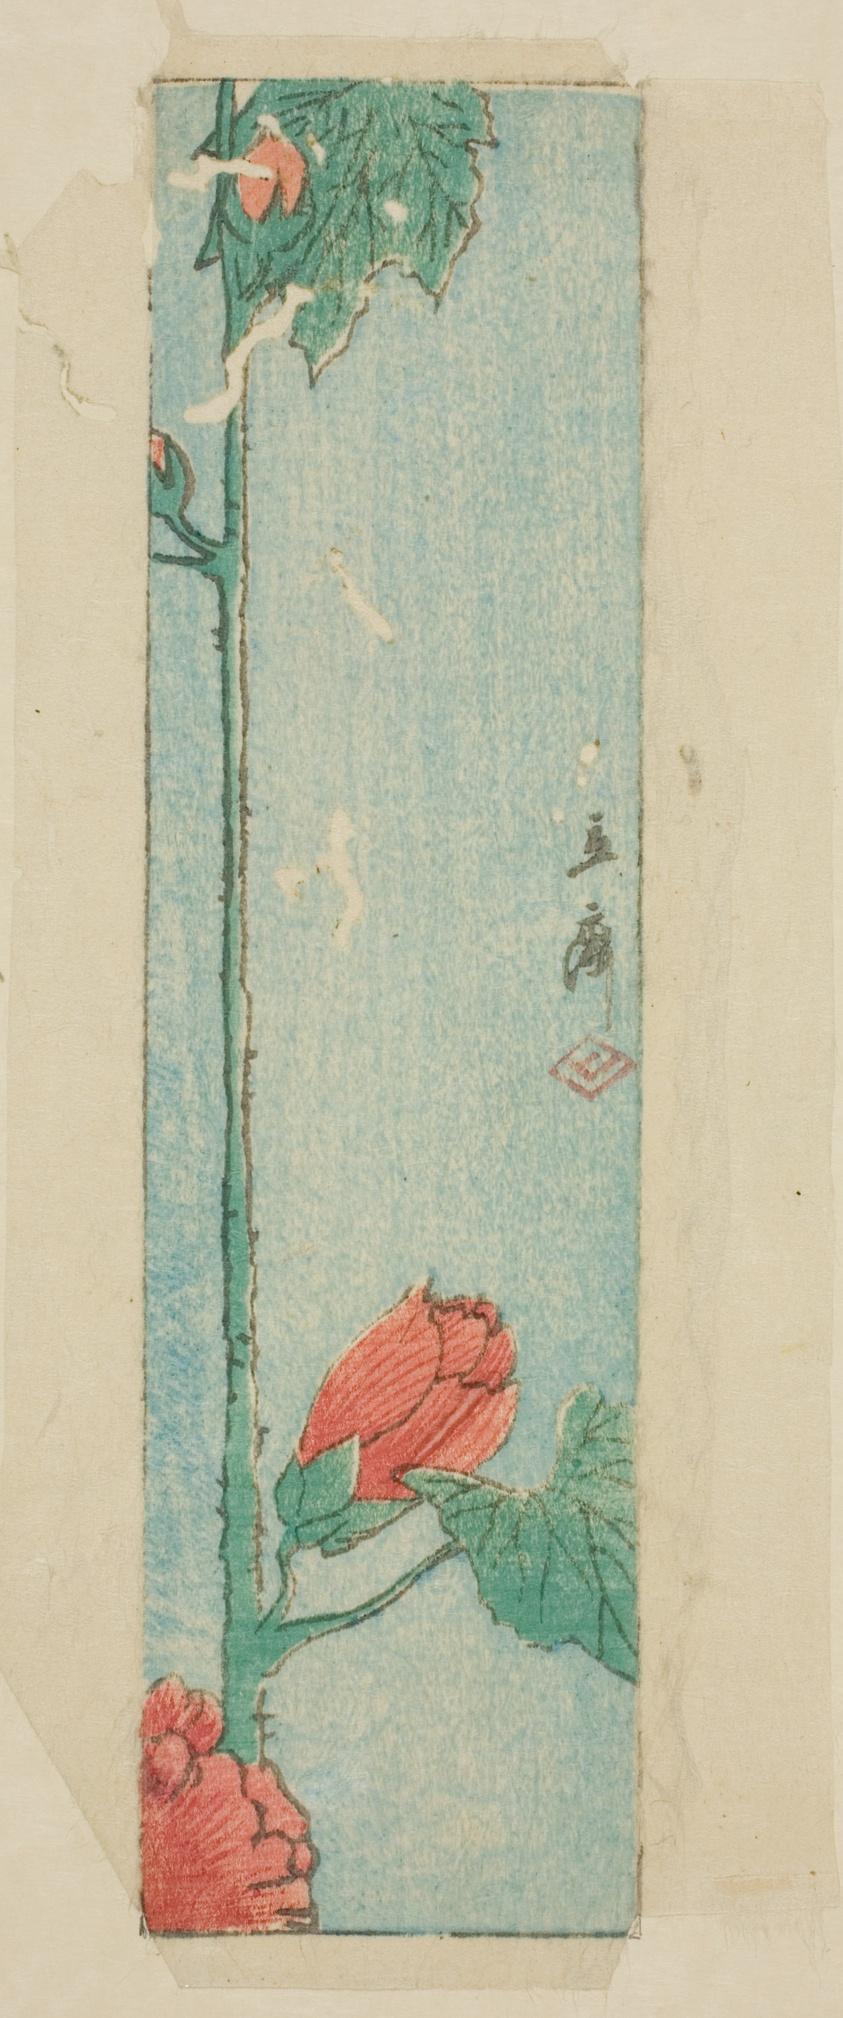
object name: Print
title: Envelope with hibiscus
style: Japanese (culture or style)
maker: Utagawa Hiroshige 歌川 広重; Japanese, 1797-1858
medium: Color woodblock print; envelope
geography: Japan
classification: woodblock print; print; asian art